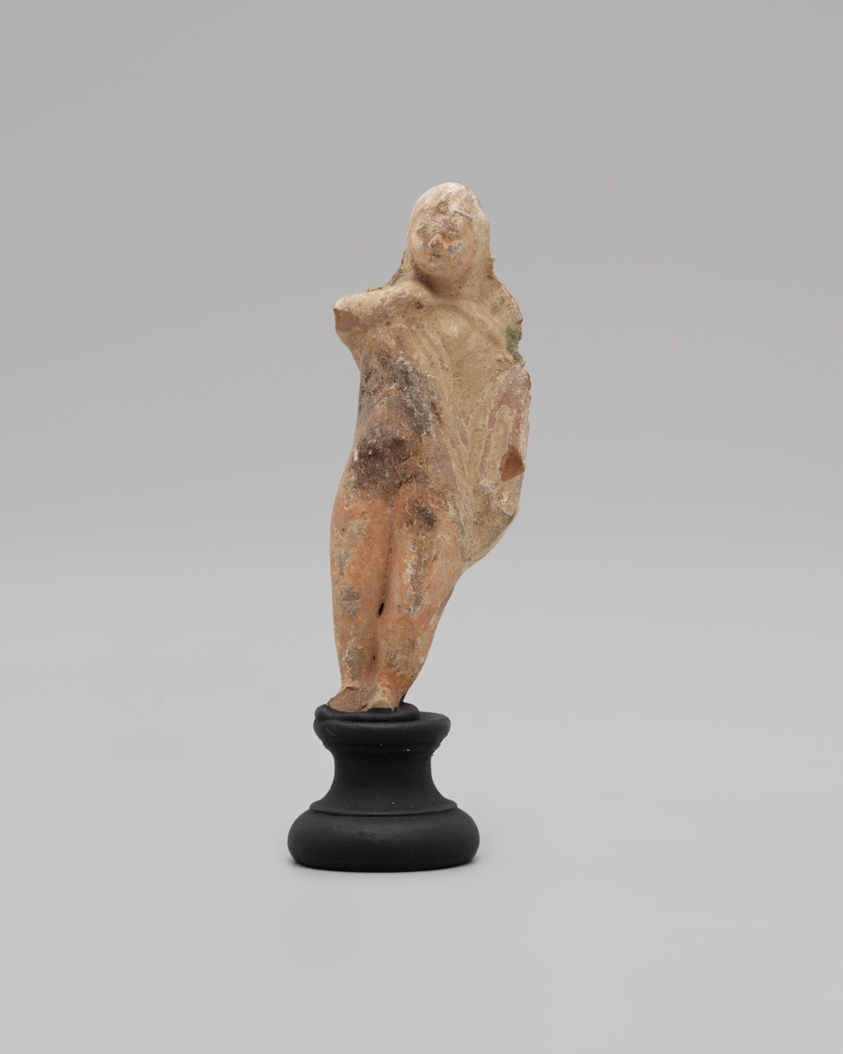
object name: Sculpture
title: Figurine of a Female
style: greek, ancient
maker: Greek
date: 3rd-2nd century BCE (?)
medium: terracotta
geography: Greece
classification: earthenware; ceramics; sculpture; ancient art